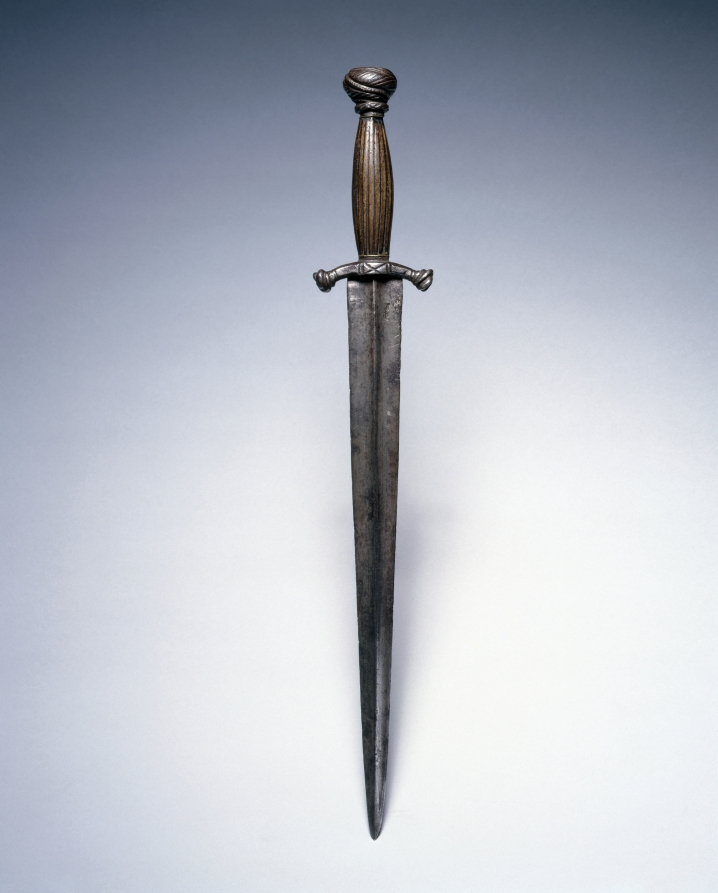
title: Dagger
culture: Germany, mid-16th century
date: mid 1500s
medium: steel; elk horn grip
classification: Arms and Armor